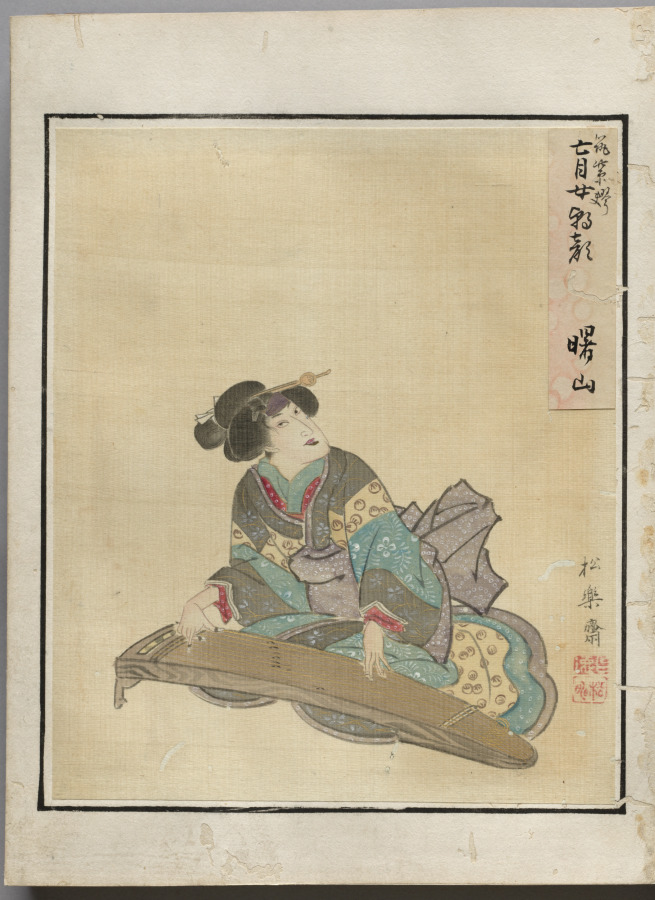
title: Double-Leaf from Album of Actor Portraits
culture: Japan, Edo period (1615–1868)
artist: Shōrakusai (Japanese)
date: c. 1790–1810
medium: double-leaf from an accordion-style album; ink on paper (left) and ink and color on silk (left)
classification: Bound Volume